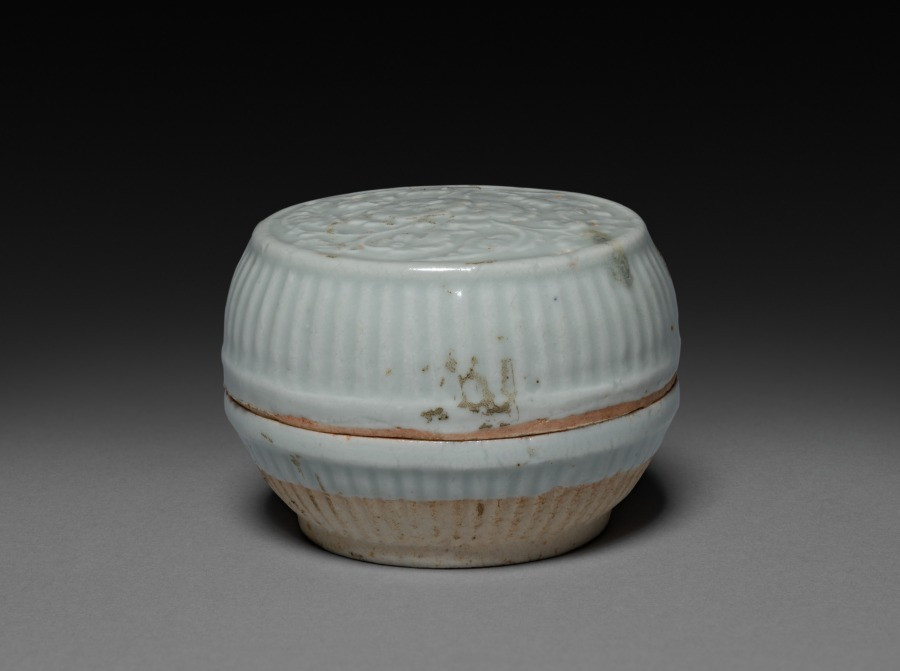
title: Circular Box: Qingbai Ware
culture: China, Southern Song Dynasty (1127-1279) - Yuan Dynasty (1271-1368)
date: 1200s-1300s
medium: glazed porcelain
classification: Ceramic